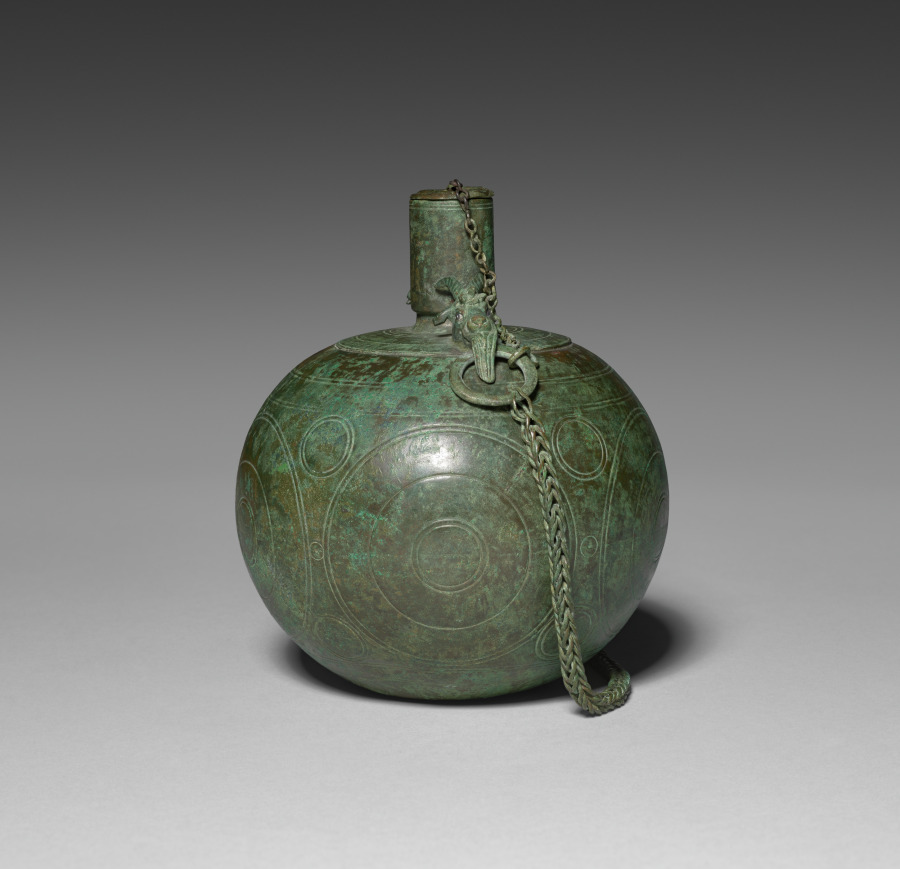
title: Canteen or Balsamarium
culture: Roman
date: 50–250 CE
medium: Bronze, cast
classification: Metalwork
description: A utilitarian container, this nearly spherical cast bronze vessel survives in surprisingly good condition. Two goat heads on the shoulder, each with inlaid silver eyes, serve as decorative attachments, holding two hand-wrought linked chains – a shorter one to secure the stopper and a longer one for hanging or carrying the vessel. The round body of the vessel is nicely complemented by a decorative program of shallowly incised bands and concentric circles.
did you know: The goat heads on the shoulder of this vessel each have inlaid silver eyes.